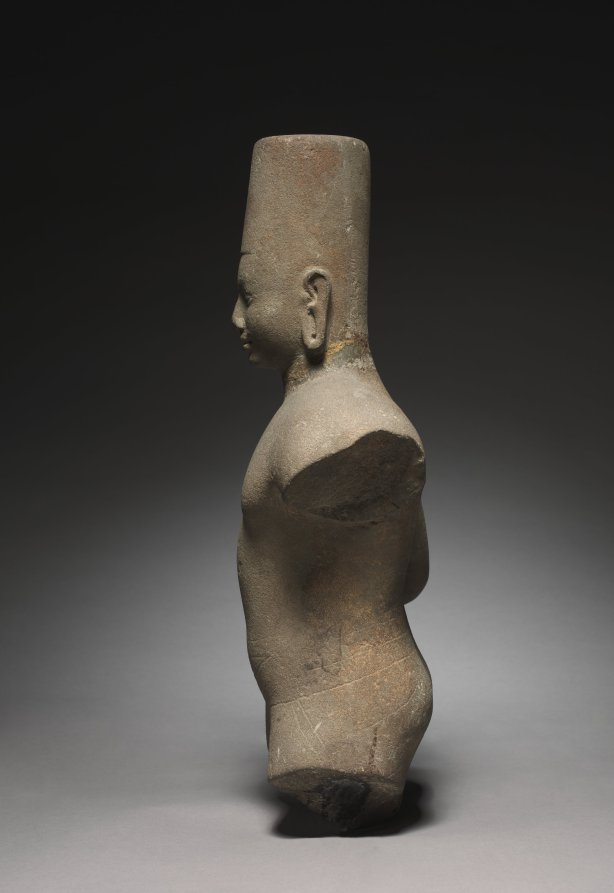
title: Vishnu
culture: Cambodia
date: 650–700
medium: sandstone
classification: Sculpture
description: Vishnu has the features of royalty, indicated by the high mitre-like crown with the flat top, distinctive to types made at the site of Prasat Andet. His status as a god, greater than any earthly king, is indicated by the four arms, traces of which are still visible. The sensitive rendering of the eyes and slight smile are characteristics of Cambodian sculpture, and during this early period, the form of the body reveals some relatively naturalistic musculature and treatment of the garments. He wears the Southeast Asian lower garment called sampot, around which his upper garment is loosely tied. It is Vishnu who incarnates himself into the world in avatars, including Krishna and the boar Varaha. Here we see his iconic form as Vishnu himself.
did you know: The deity is four-armed with the arms running parallel from the shoulders and then bifurcating at the elbows.